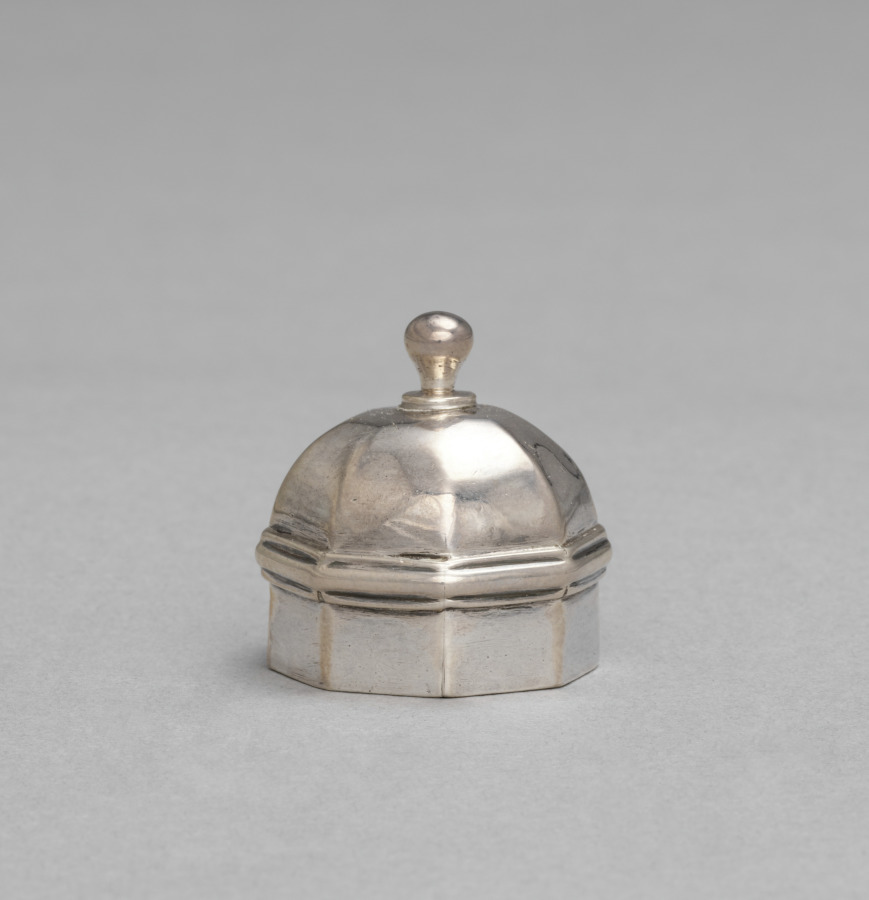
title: Cover for a Tea Caddy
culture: England, London, 18th century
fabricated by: Thomas Ash (British)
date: 1713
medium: silver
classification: Silver